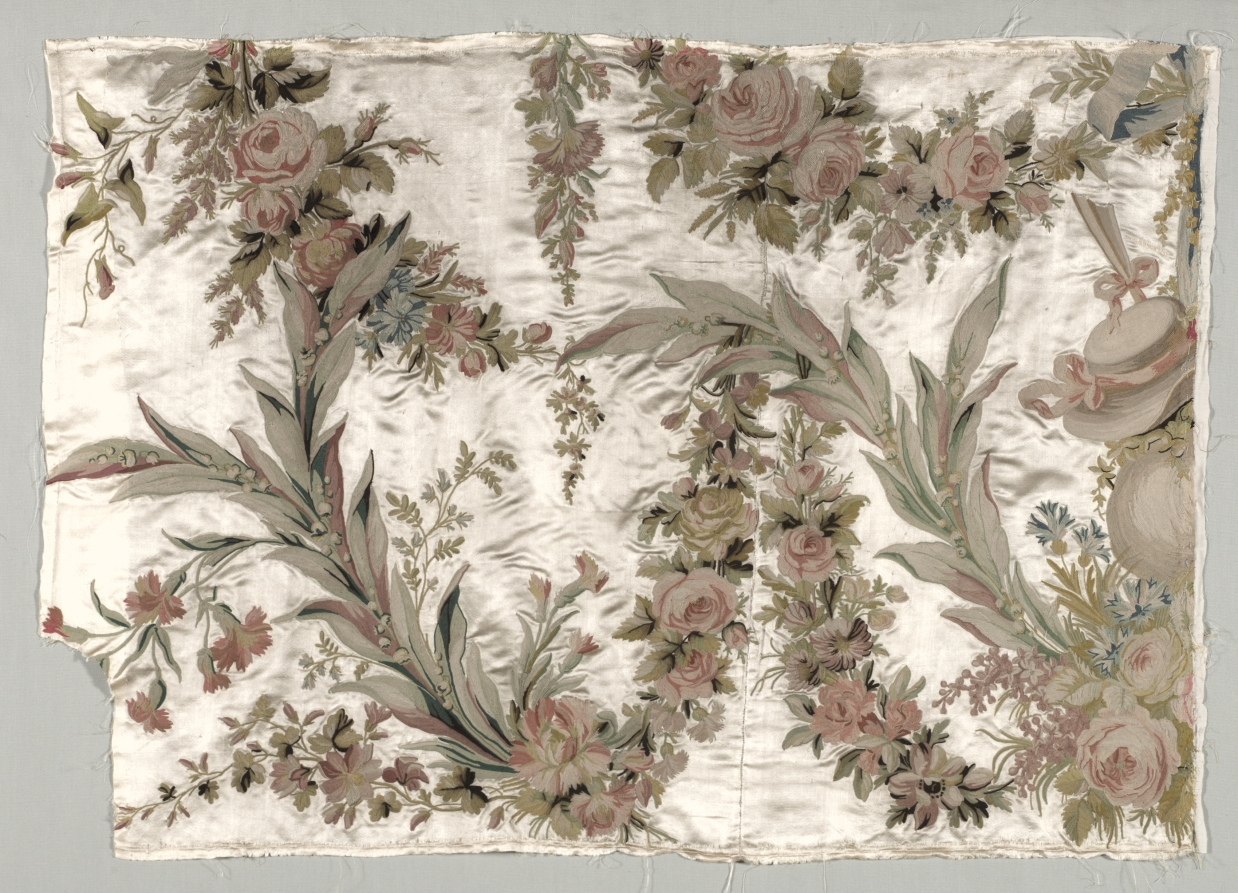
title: Coverlet Fragment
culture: France, 18th Century, period of Louis XVI (1774-1793)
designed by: Philippe de Lasalle (French, 1723–1805)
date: c. 1760–1770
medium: embroidered satin and silk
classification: Textile